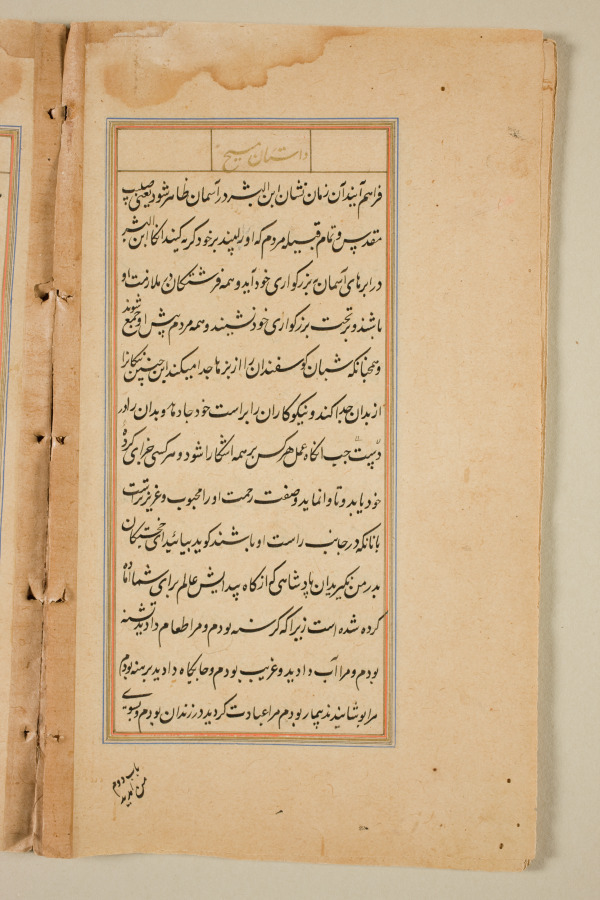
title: Text page from a Mirror of Holiness (Mir’at al-quds) of Father Jerome Xavier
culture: Mughal India, Allahabad, made for Prince Salim (1569–1627)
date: 1602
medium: Ink and gold on paper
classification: Manuscript